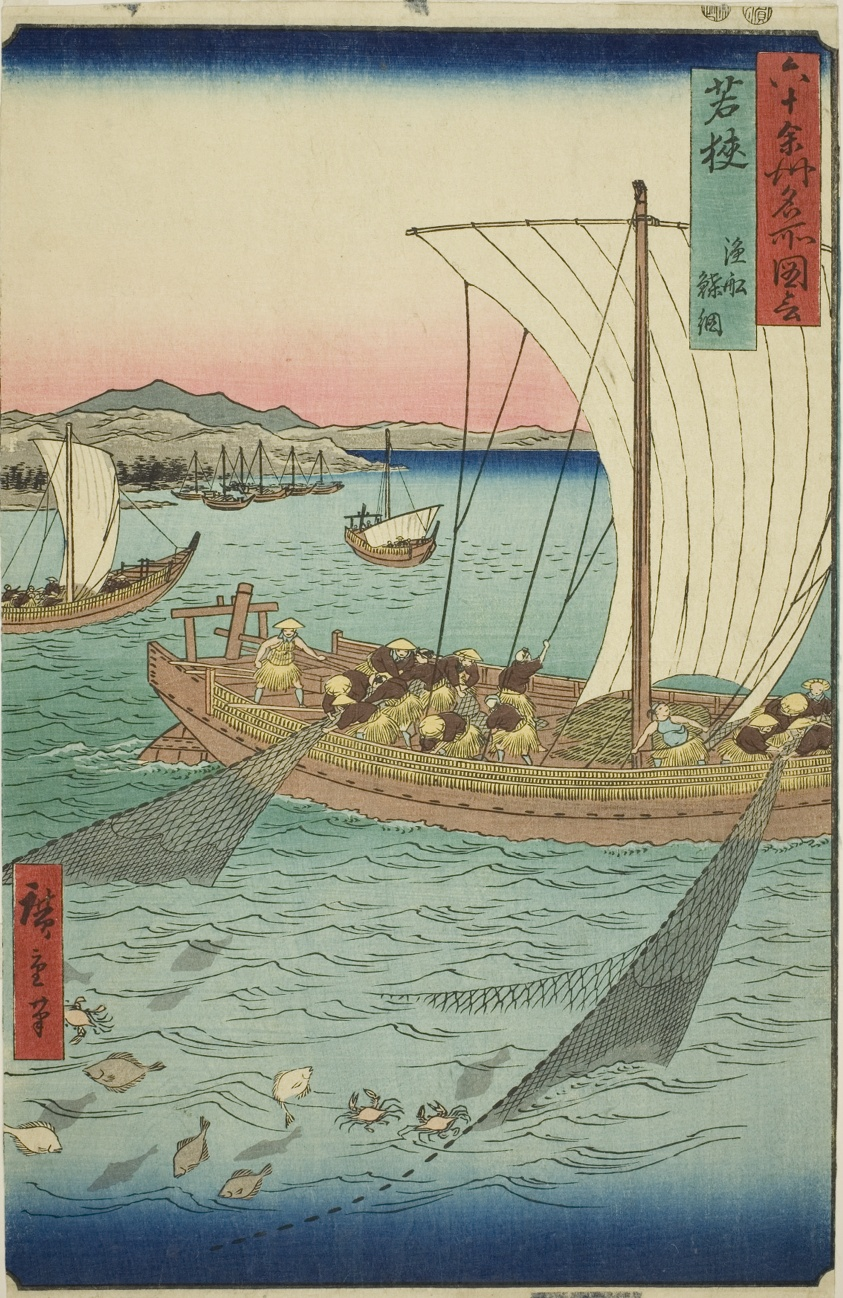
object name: Print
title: Wakasa Province: Fishing Boat Netting Flatfish (Wakasa, gyosen karei ami), from the series "Famous Places in the Sixty-odd Provinces (Rokujuyoshu meisho zue)"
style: Japanese (culture or style)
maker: Utagawa Hiroshige 歌川 広重; Japanese, 1797-1858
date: 1853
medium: Color woodblock print; oban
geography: Japan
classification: woodblock print; print; asian art